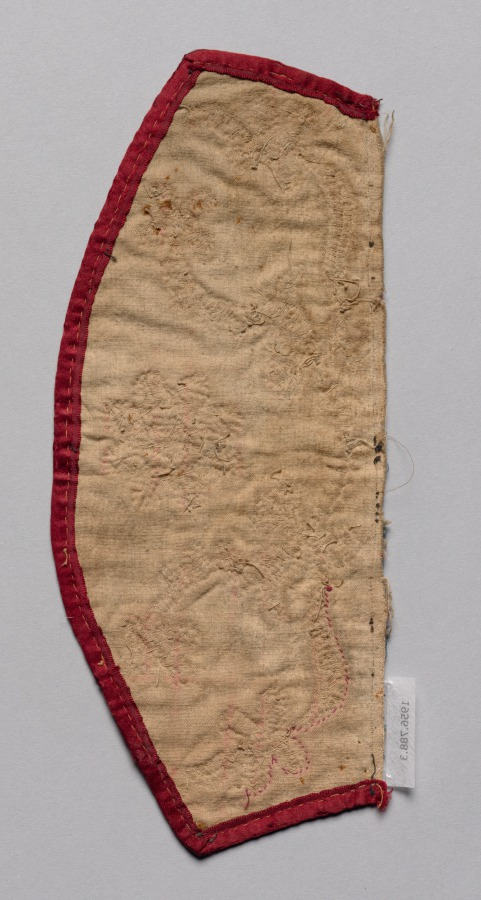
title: Cuff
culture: Northeast Woodlands, Great Lakes Region, Anishinaabe (Ojibwe) or Nehiyawak (Cree) People?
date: late 1800s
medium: Velvet, satin, glass beads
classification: Garment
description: In the 1800s, native peoples began to use European fabrics to fashion fine formal garments; they favored sturdy cloth, such as velvet and wool broadcloth, which provided support for heavy decorative beadwork that was added by hand. Often the fabric was a dark color, providing dramatic contrast for the multicolored beads. Rather than encrusting the entire garment, beadwork was confined to cuffs, “epaulettes,” bib-like plackets and yokes, rectangular panels sewn to leggings, shirts, and dresses, and the like.